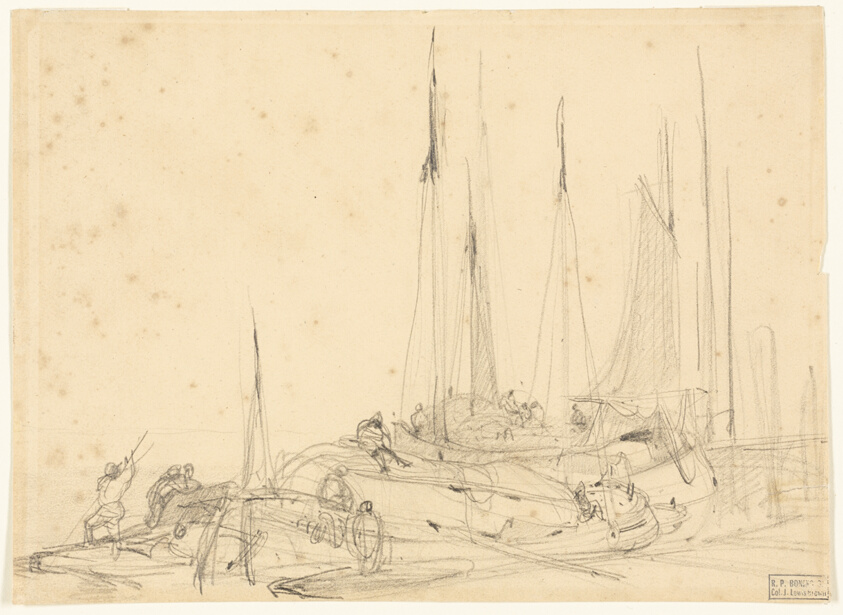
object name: Drawing and Watercolor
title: Fishing Boats in Port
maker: Follower of Richard Parkes Bonington (English, 1802-1828)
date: c. 1830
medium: Graphite on tan wove paper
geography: England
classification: graphite; drawings (visual works); prints and drawing